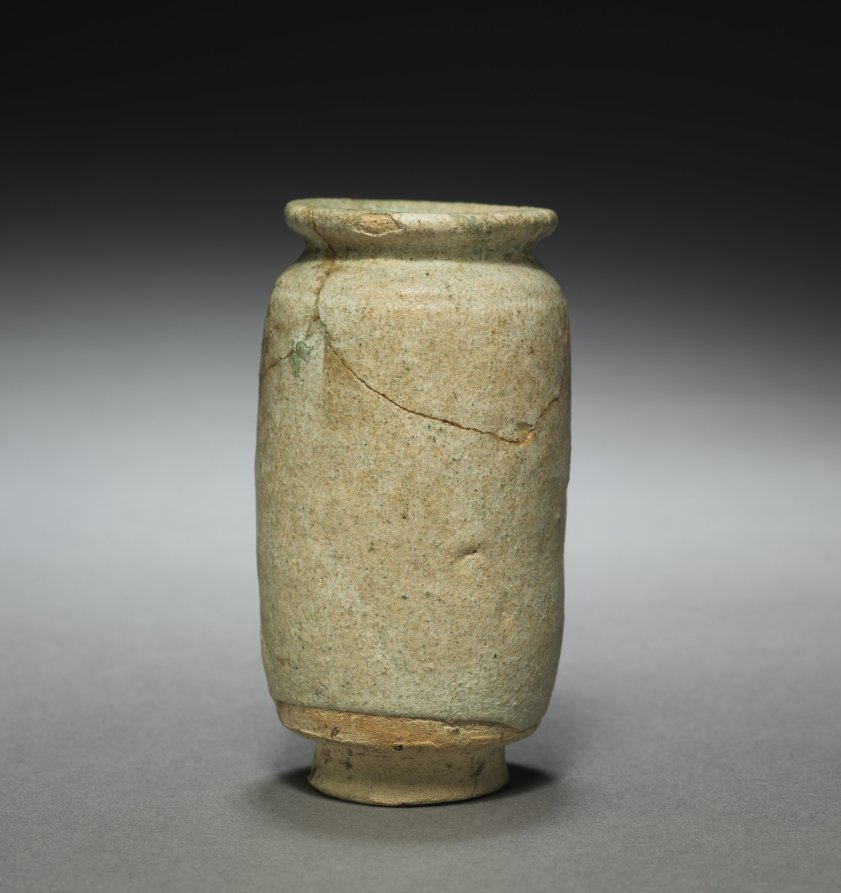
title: Bottle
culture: Parthian Empire (247 BCE–224 CE)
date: 1–200 CE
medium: earthenware with weathered glaze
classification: Ceramic